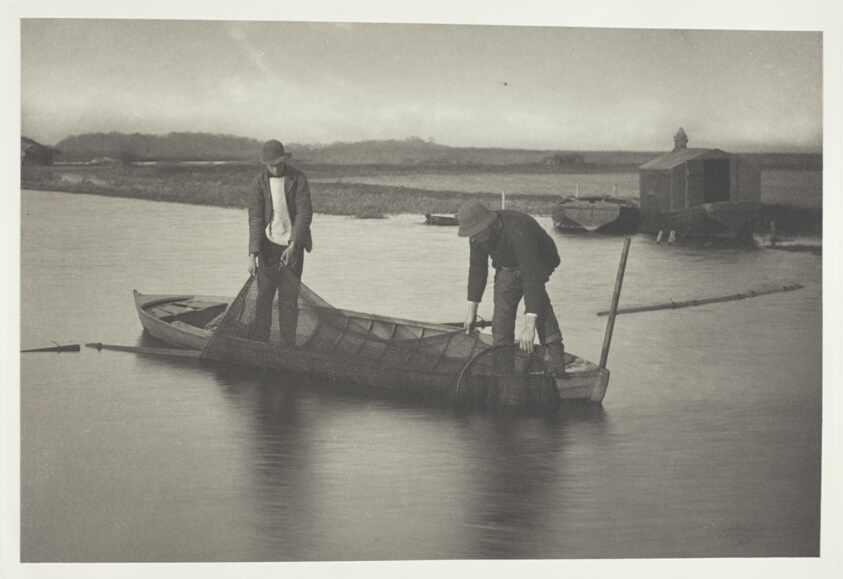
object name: Photograph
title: Taking up the Eel-Net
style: 19th century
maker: Peter Henry Emerson (English, born Cuba, 1856–1936)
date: 1886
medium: Platinum print, pl. VII from the album "Life and Landscape on the Norfolk Broads" (1886)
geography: England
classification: platinum print; photographic process; photography; photograph